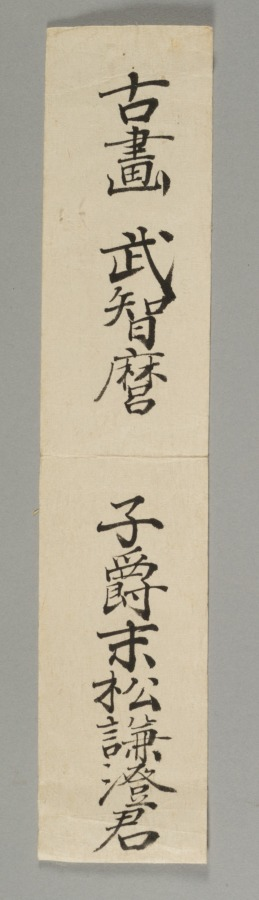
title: Fujiwara no Muchimaro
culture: Japan, Kamakura period (1185–1333)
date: 1200s or 1300s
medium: Hanging scroll; ink, color, gold, and cut gold on silk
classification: Painting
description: This portrait of Fujiwara no Muchimaro (680–737), a grandson of Fujiwara no Kamatari (614–669), includes an image of Buddha Dainichi Nyorai above his head. By situating the image of Dainichi there, this painting would seem to assert that Muchimaro is an avatar of Dainichi. In the same way that kami could be identified with Buddhist counterparts, powerful humans could also be seen as manifestations of Buddhist deities. A similar painting is at Eizanji in Nara, of which Muchimaro is known as the founder. It was once a branch temple of Kōfukuji, the Fujiwara family temple.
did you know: The boughs of wisteria appearing in the background symbolize the figure's status as a Fujiwara family member.